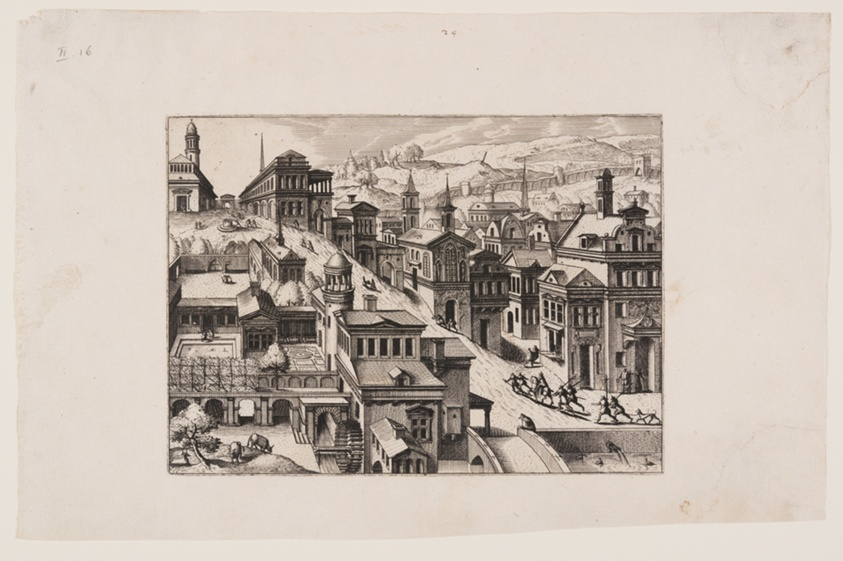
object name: Print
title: Bird’s-eye view of a town with a street going uphill from bottom right to top left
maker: Johannes van Doetecum (Netherlandish, 1528/32–1605) and Lucas van Doetecum (Dutch, died before 1584); after Hans Vredeman de Vries (Netherlandish, 1527-1604)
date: 1562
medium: Engraving on ivory laid paper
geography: Netherlands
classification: engraving; paper; print; prints and drawing